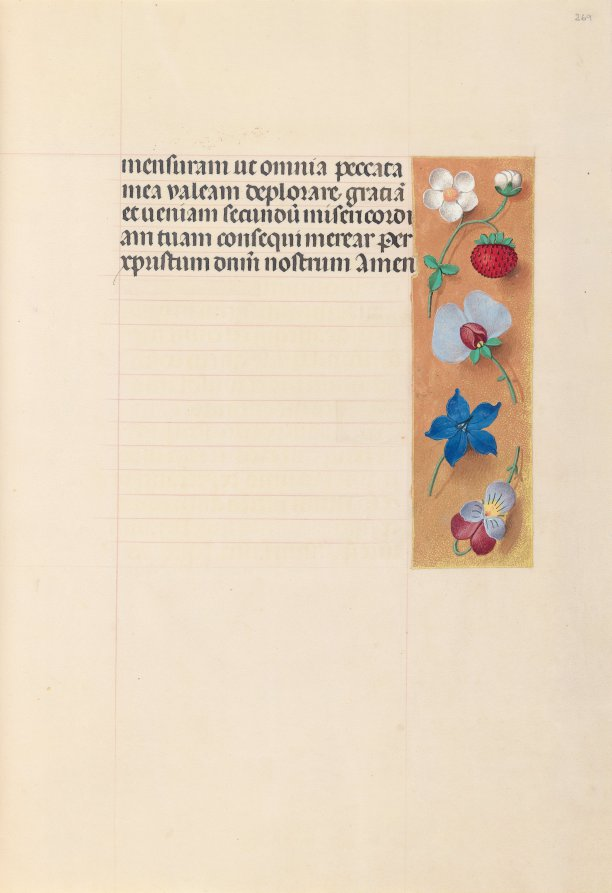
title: Hours of Queen Isabella the Catholic, Queen of Spain: Fol. 269r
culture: Flanders, Ghent and Bruges, late 15th century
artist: Master of the First Prayerbook of Maximillian (Flemish, c. 1444–1519)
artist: and Associates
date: c. 1500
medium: ink, tempera, and gold on vellum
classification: Bound Volume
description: This manuscript was illuminated by a circle of at least five highly organized manuscript painters active in the Flemish cities of Ghent and Bruges. The principal illuminator was Alexander Bening, who painted the majority of the book's miniatures. Manuscripts produced by this circle of artists are renowned for the decoration of their borders, which typically feature a rich variety of realistically-painted flowers, birds, and butterflies. This prayer book, called a book of hours, was intended not for a cleric, but for the private devotions of a lay person-in this case, Isabella the Catholic, Queen of Spain (1451-1504). Isabella's coat of arms embellishes the book's frontispiece. It is unlikely that the book was commissioned by the Queen herself; rather, she probably received it as a diplomatic gift from someone courting her patronage, perhaps Cardinal Francisco Jimenez de Cisneros. A Franciscan friar, Jimenez was dependent upon Isabella for his advancement, first to the post of Queen's confessor in 1492, and then to Archbishop of Toledo in 1495.